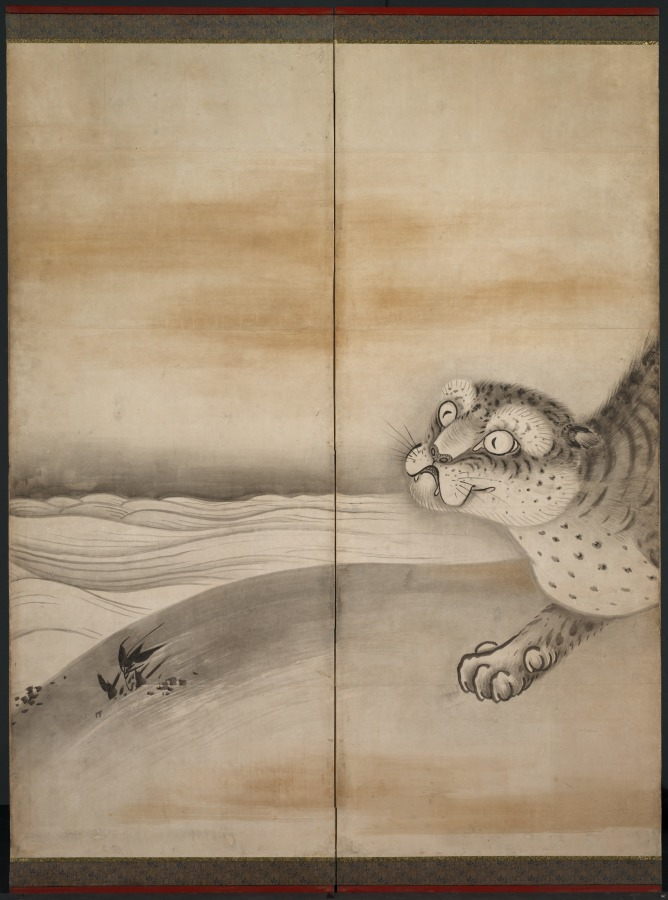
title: Tiger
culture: Japan, Edo period (1615–1868)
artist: attributed to Soga Nichokuan (Japanese)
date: early to mid-1600s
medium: six-panel folding screen; ink, slight color, gold, and silver on paper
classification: Painting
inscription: Signed: Soga Chokuan II (Soga Chokuan ni). Sealed: Hoin (right), Soga Chokuan Hoin (three seals at left) Edo period (1615-1868)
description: A tiger looks upon a waterfall as it prowls out of a bamboo grove on this screen, and a dragon dives through clouds on the right. Tiger and dragon are traditional symbols of the balancing forces in the world, yin (the feminine aspect) and yang (the masculine aspect). This painting has a signature and seals, identifying it as a work by Soga Nichokuan, a painter thought to be from Sakai (near Osaka), and known primarily for his representations of hawk-eagles (kumataka).